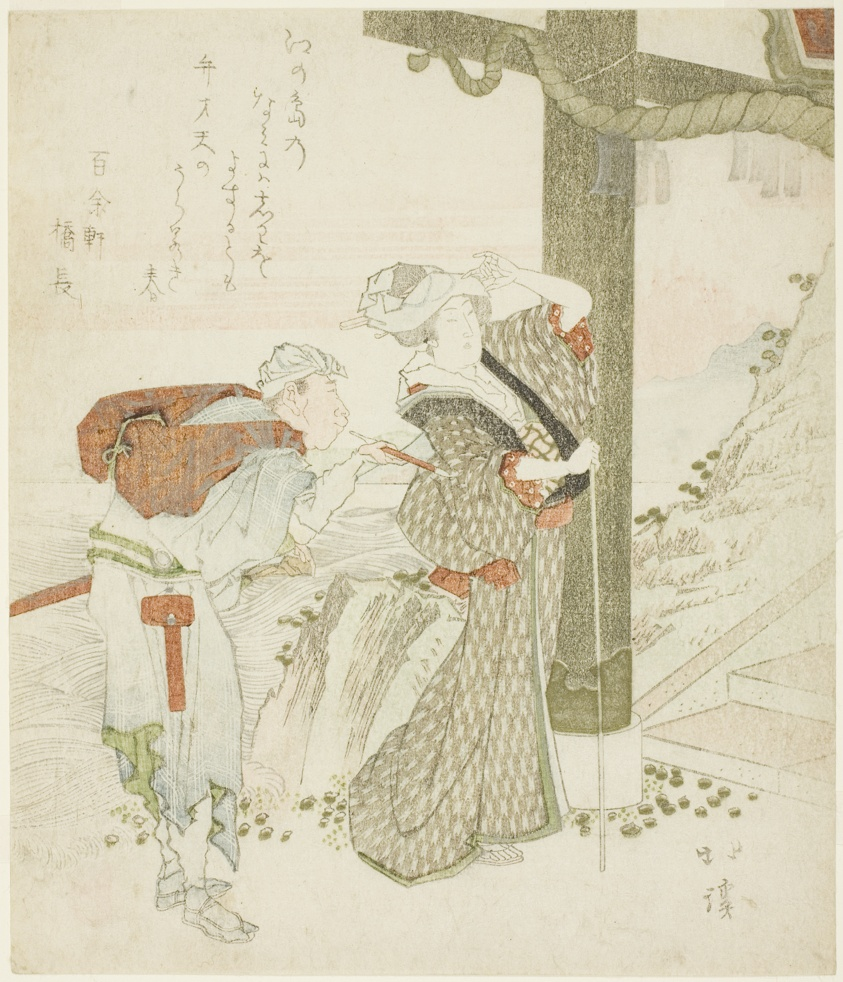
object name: Print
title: Woman and attendant at entrance gate of Enoshima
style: Japanese (culture or style)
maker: Totoya Hokkei (Japanese, 1780-1850)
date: 1810s/1820s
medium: Color woodblock print; shikishiban, surimono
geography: Japan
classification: woodblock print; print; asian art